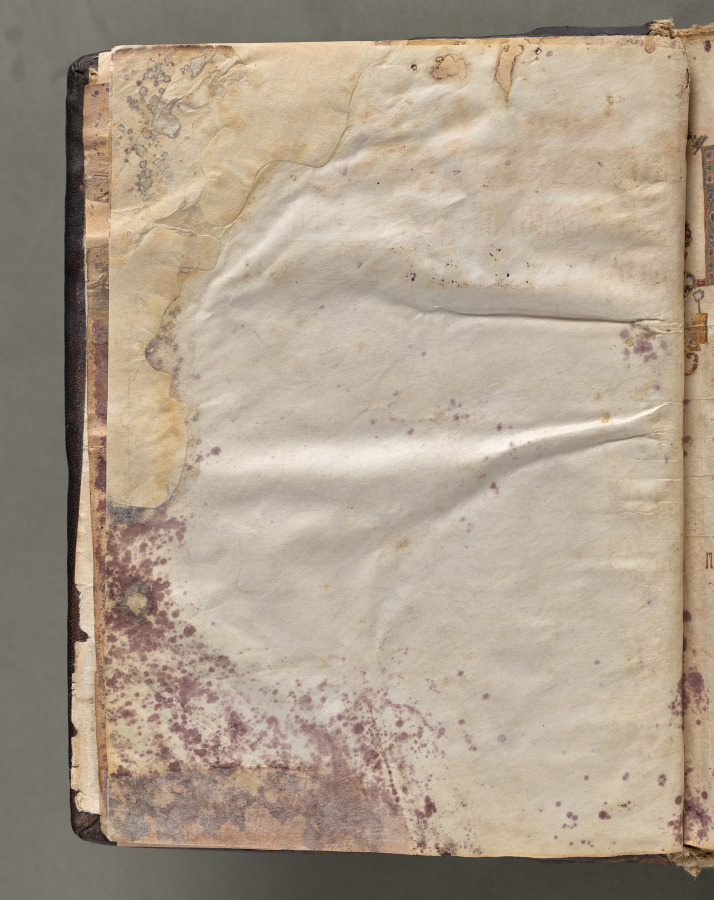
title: Text, folio 5 (verso), from a Gospel Book with Commentaries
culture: Byzantium, Constantinople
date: c. 1000–1100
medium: ink, tempera, and gold on vellum; leather binding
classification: Bound Volume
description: Each of the four gospels in this book opens on a page with brilliantly illuminated borders depicting the author of the text as well as birds-principally peacocks, symbols of the immortality of the soul-and fountains, representing the fountain of life and the salvation of the soul. This volume consists of 428 leaves with texts in Greek. Its level of sophistication suggests that it was probably written and decorated in a monastery in Constantinople.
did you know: Gospel Books were carried in procession through Byzantine churches.